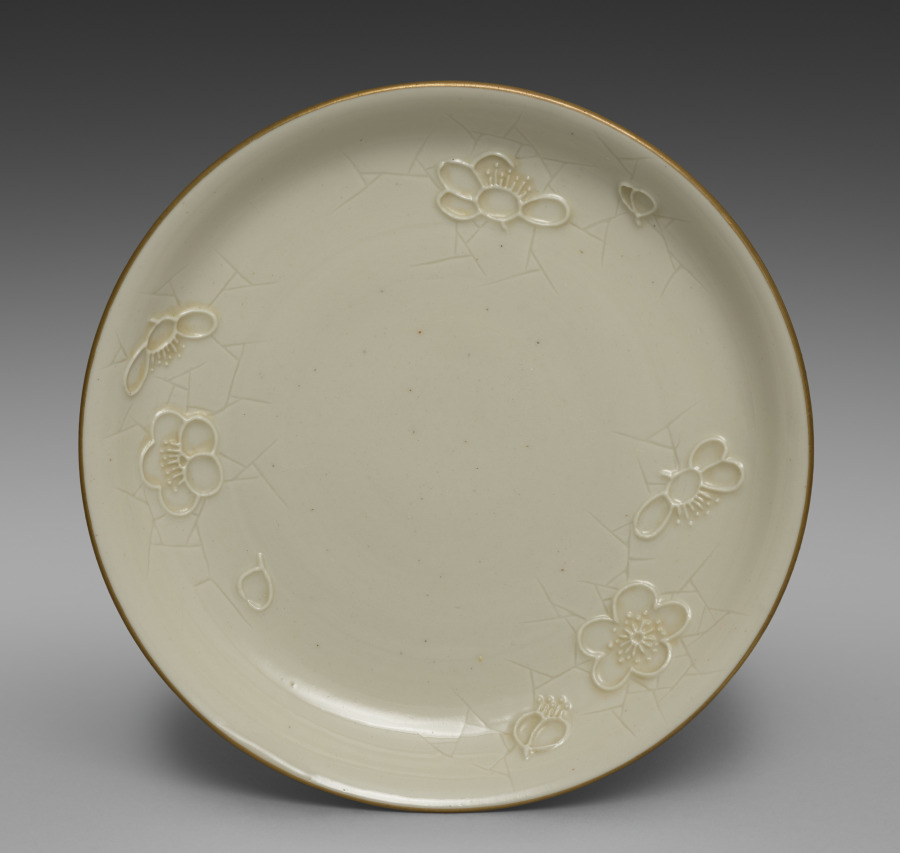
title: Medium-sized Dish from Dining Set with Plum Blossoms and Cracked-Ice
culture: Japan, Meiji period (1868–1912)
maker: Seifū Yohei II (Japanese, 1844–1878)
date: c. 1875–78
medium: Porcelain with molded designs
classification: Ceramic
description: Each item in this set has a delicate low-relief design of flowering plum branches over scattered, intersecting lines meant to resemble the cracked-ice surface of a frozen body of water and is signed on the base in gold pigment. While Yohei II produced many fine works in underglaze blue, like those produced by Kiyomizu Shichibei, he also made works in quite different styles later in his career, from the early 1870 s. In 1873, he was appointed purveyor to the Industrial Center of Kyoto Prefecture, a designation associated with Kyoto’s efforts to reach an international market through the port of Kobe; and from 1875 until his death, he was involved in national-level projects to present Japanese ceramics across the world. It was during this period that Yohei III was apprenticed to Yohei II, and it has been suggested that this set may in fact be an early example of Yohei III’s work, which he signed with his teacher’s name. Decorated with flowers resembling Japanese textile motifs, the set calls to mind the design of Yohei II’s pair of vases with plum blossoms in the Victoria and Albert Museum. Here, the elaborate trees created for a formal public exhibition setting have been translated into the approachable blossoms of the genteel domestic environment. While the designs are consistent across the pieces, each raised flower petal and pistil and each incised line in the ice was done by hand, so the cups, bowls, and dishes are similar yet unique. The bottoms of two boxes once identified the set’s owner, but the information has been deliberately obscured with black ink. However, inscriptions still visible appear to indicate two occasions, once at the end of July 1886 , and once again in June 1916 , when parts of the set were requested from Hokura in Niigata Prefecture. The location corresponds to a neighborhood in the present-day city of Jōetsu. The surname Tsuji 辻 also appears on a paper tag affixed to one of the box cloths. Future research may possibly reveal more about their provenance. A vase by Yohei III in a private collection combines the formal grandeur of the Yohei II vases in the Victoria and Albert Museum with the gentler design of this dining set, placing flowering plum trees against soft, scalloped-edge clouds resembling those in golden screens.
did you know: The dining wares have a creamy white coloration that the four boxes containing them identify as Korean in style.